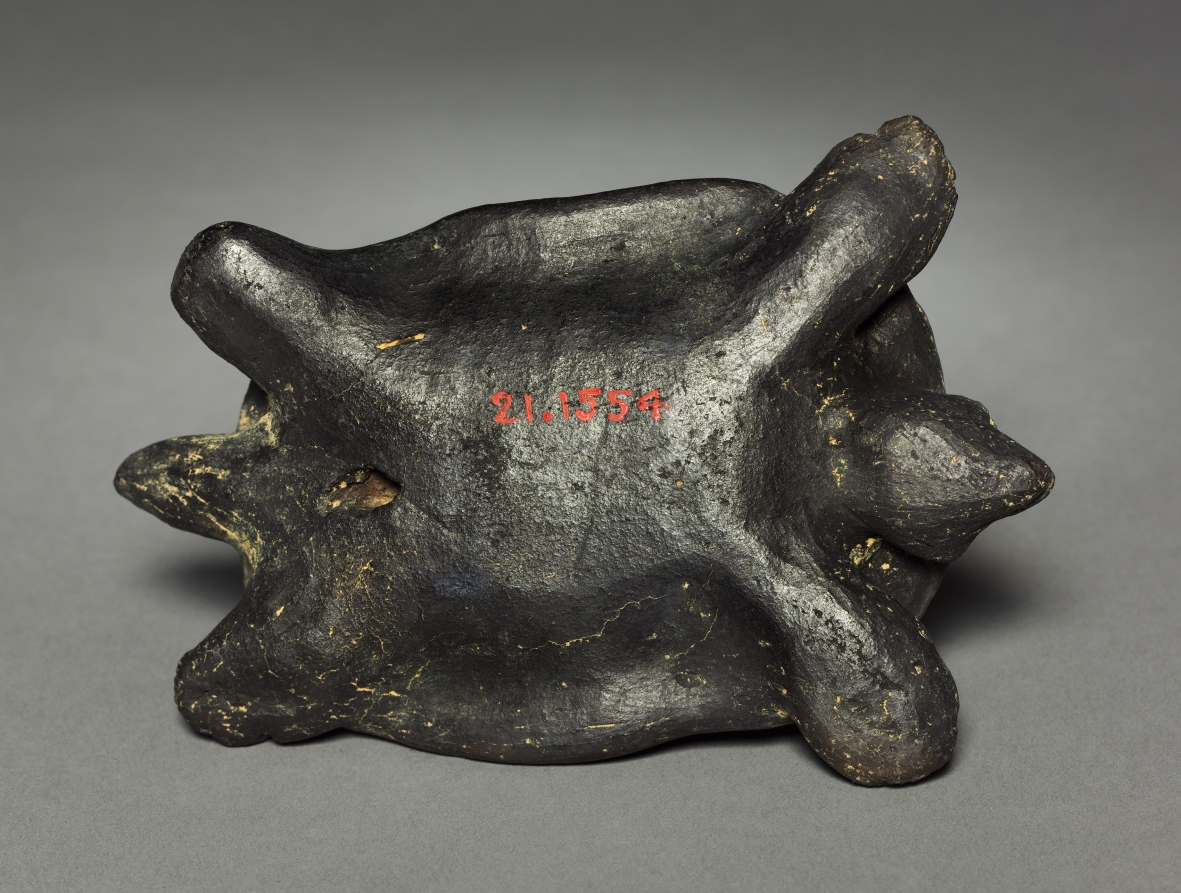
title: Turtle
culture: Colombia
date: before 1921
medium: pottery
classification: Ceramic